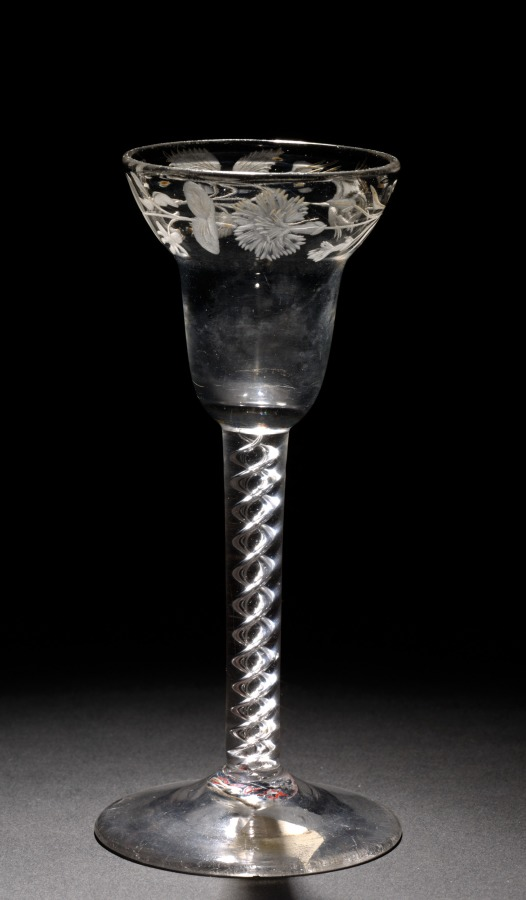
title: Wine Glass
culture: England, 18th century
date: 1750–1799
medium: glass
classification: Glass